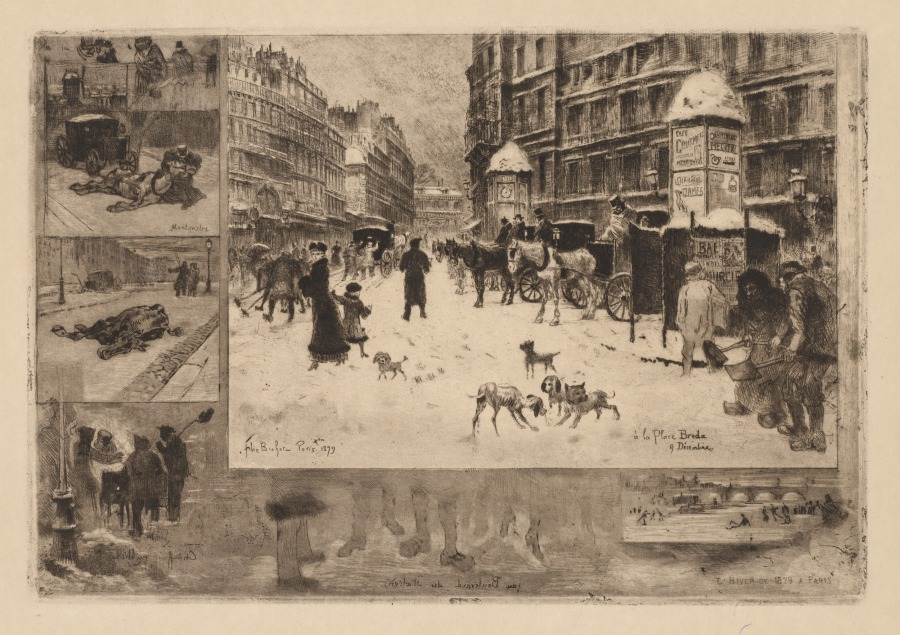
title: Winter in Paris (L’hiver à Paris or La neige à Paris)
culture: France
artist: Félix Hilaire Buhot (French, 1847–1898)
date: 1879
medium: Etching and aquatint with roulette and drypoint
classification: Print